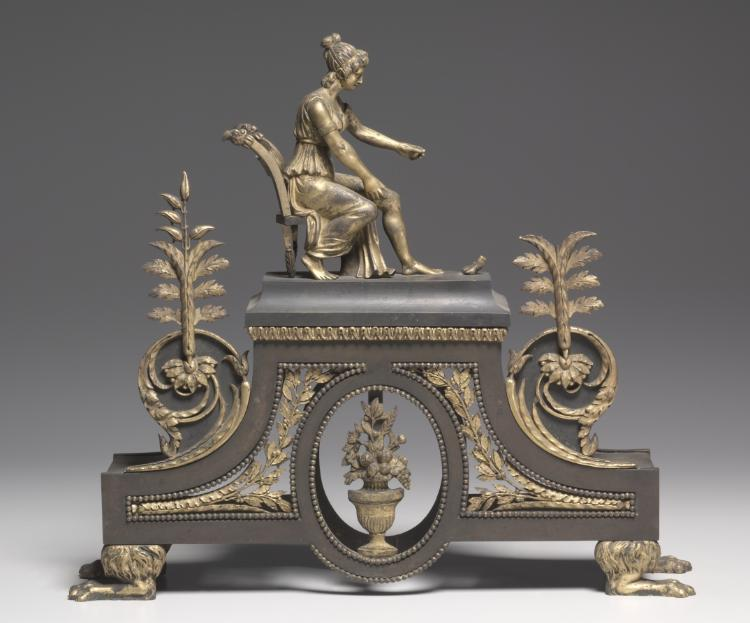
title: Firedog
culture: France, 18th century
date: c. 1790–1800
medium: bronze and gilded bronze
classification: Furniture and woodwork